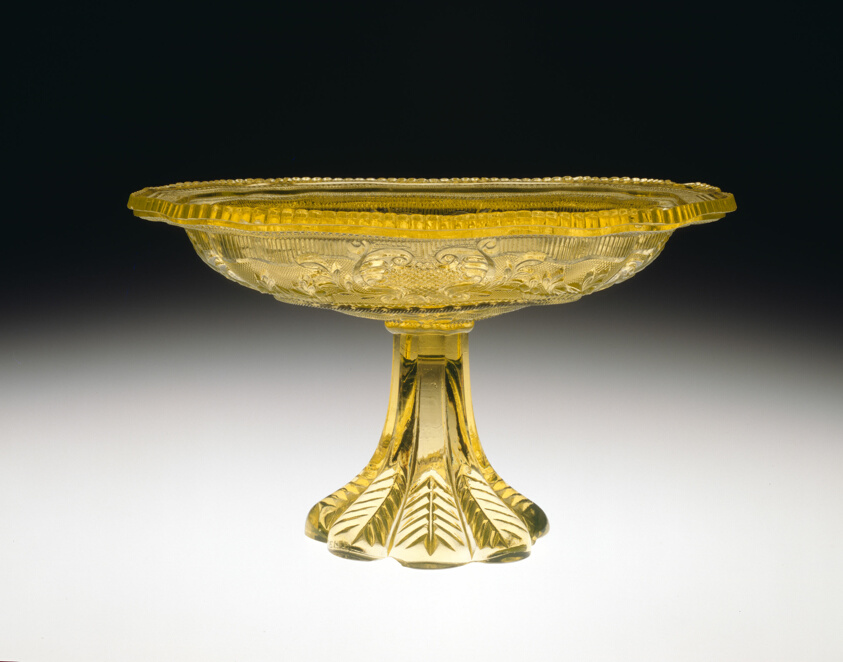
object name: Glass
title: Compote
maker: Boston and Sandwich Glass Company (Sandwich, Massachusetts, 1825–1888)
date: 1830–45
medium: Pressed lead glass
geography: Massachusetts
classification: compote; glass; vessel for serving food; american decorative arts; american arts; decorative arts